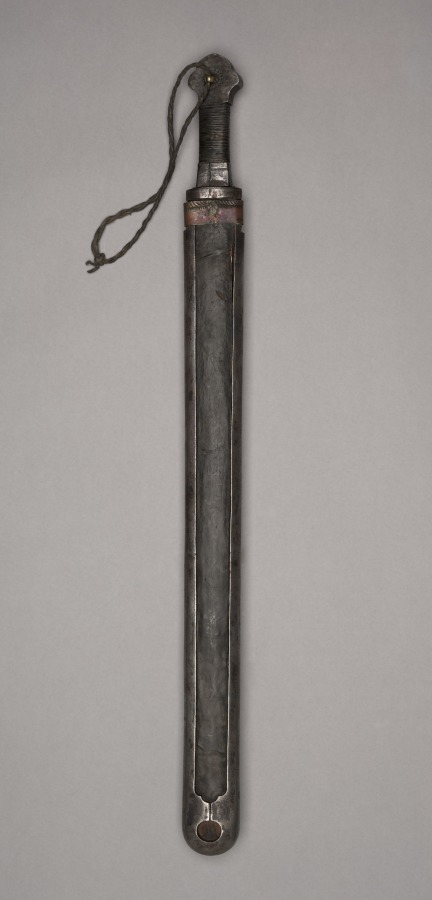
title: Sword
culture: India, Bhutan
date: 1800s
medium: iron with gilt and leather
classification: Arms and Armor